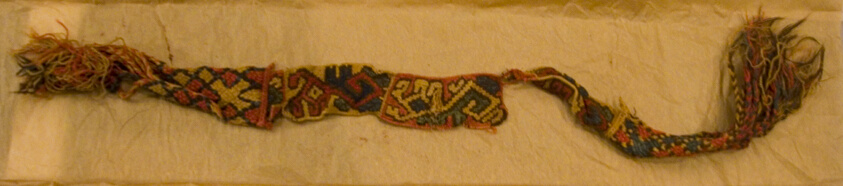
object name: Textile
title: Band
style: nazca, andean, andes, Pre-Columbian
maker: Nazca-Wari; Peru, south coast, Nazca Valley, Hacienda las Trancas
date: A.D. 700/900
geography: Peru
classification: textile; weaving